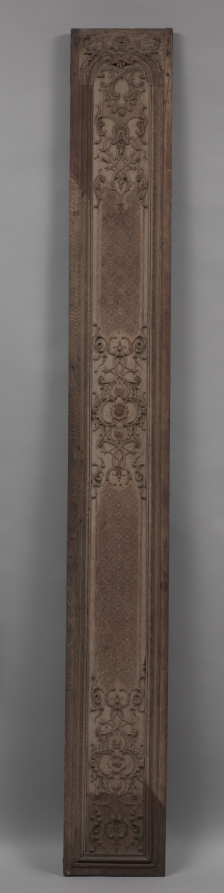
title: Panel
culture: France, Regency Period, 18th Century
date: 1715–1723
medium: wood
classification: Furniture and woodwork